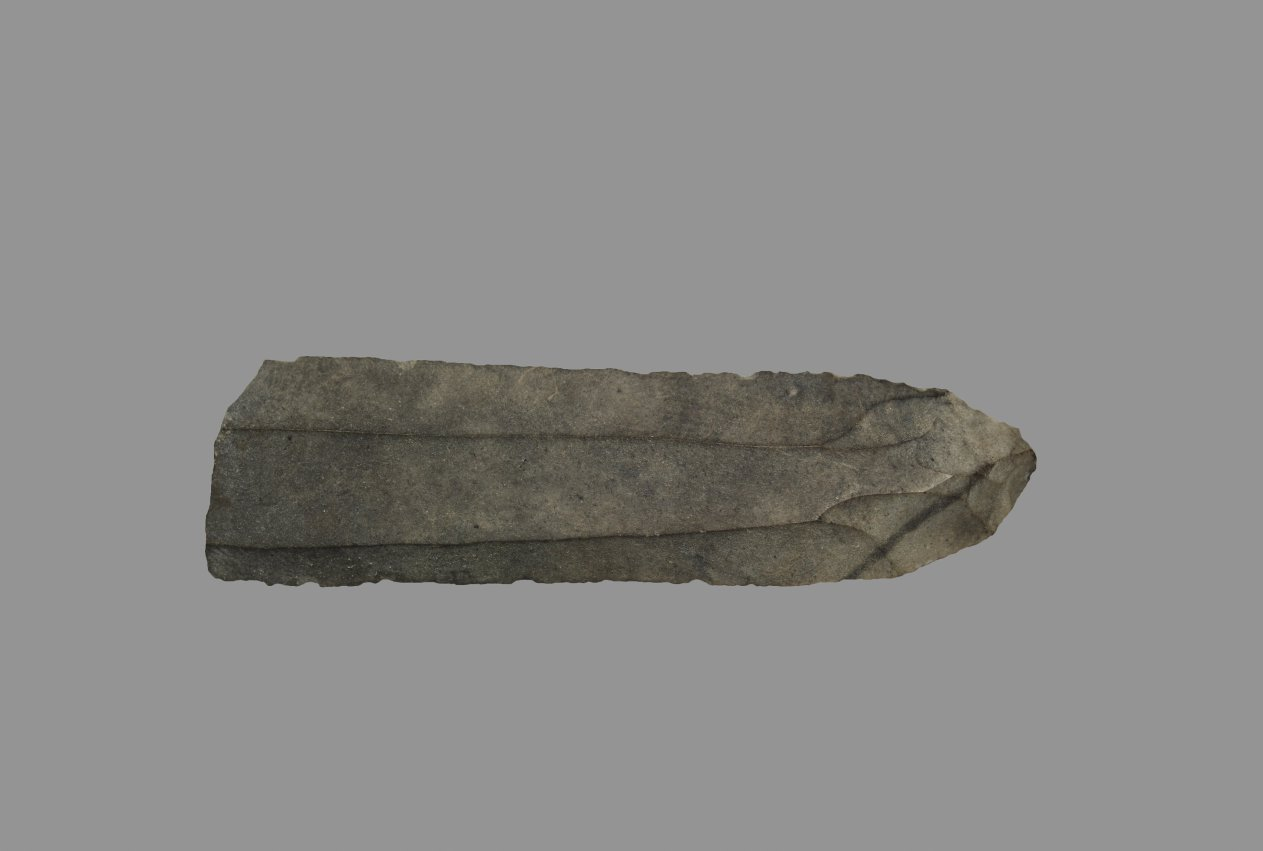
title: Sickle Blade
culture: Egypt, Middle Kingdom (2040–1648 BCE), Dynasty 12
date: 1980–1801 BCE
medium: flint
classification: Implements